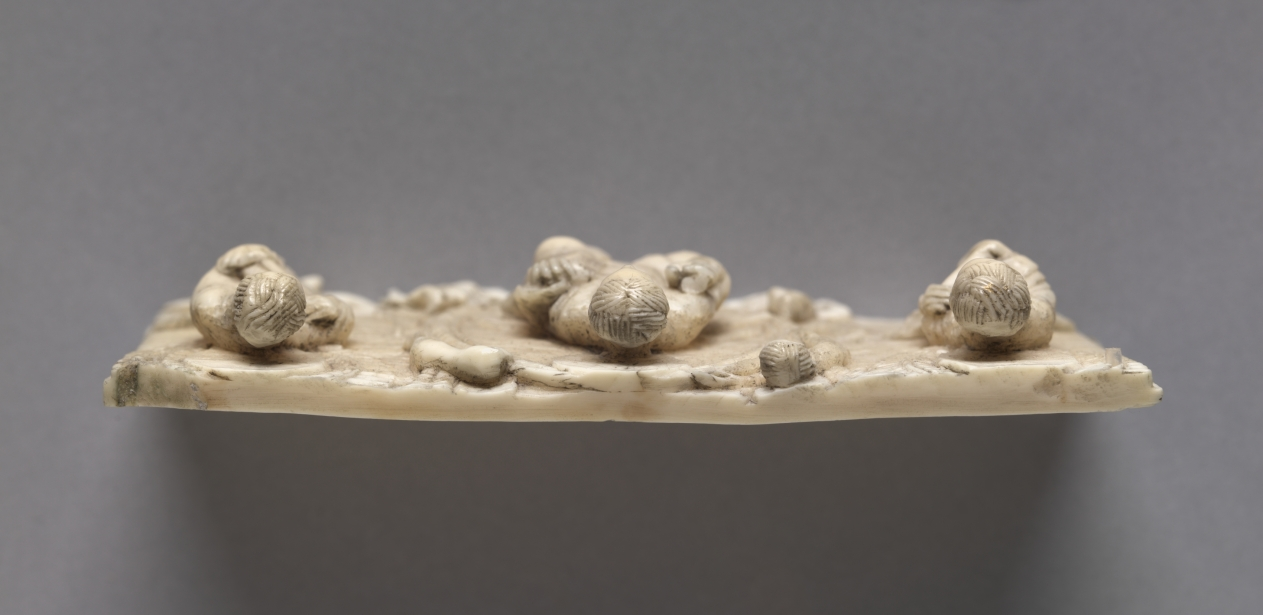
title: Plaque from a Portable Altar Showing Christ and the Apostles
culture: Germany, Lower Rhine Valley, Romanesque period, 11th century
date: 1050–1100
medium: walrus ivory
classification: Ivory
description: This intricately carved ivory panel once decorated the side of a portable altar. One of three plaques, it depicts Christ in Majesty and his apostles and were the first major acquisition of William M. Milliken, the museum's first curator of decorative arts and later director (1930–1958). As Milliken later recalled, the pieces "were immensely intriguing, monumental in scale, even if tiny in size, the Christ in the mandorla could have been enlarged and would have graced the tympanum of a great cathedral."